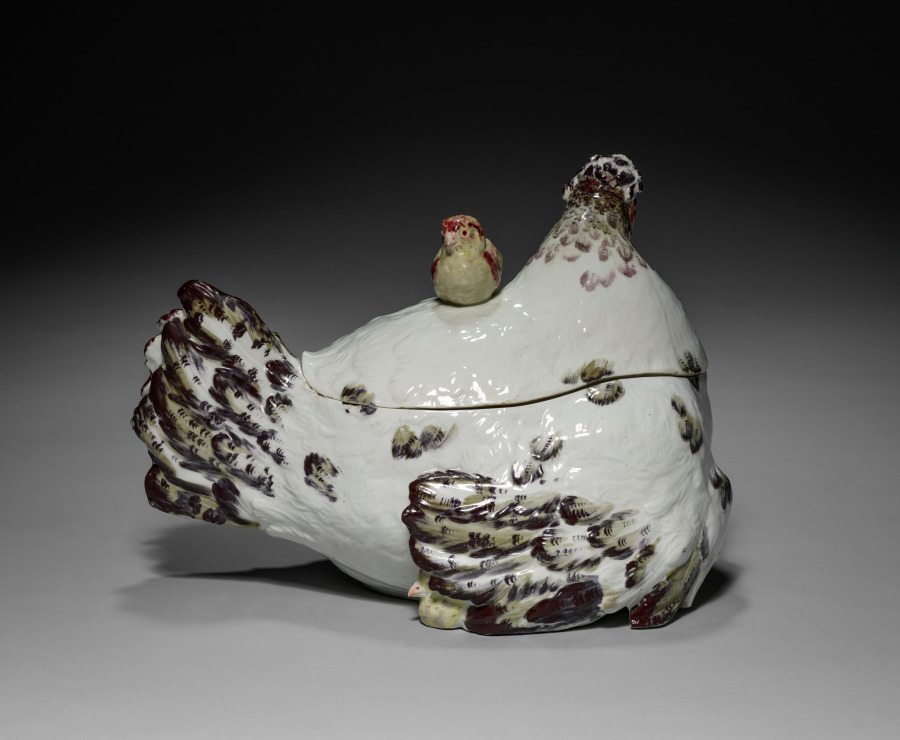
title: Hen and Chicks Covered Tureen on Stand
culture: England, London, Chelsea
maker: Chelsea Porcelain Factory (Britain, London, 1745–84)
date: c. 1755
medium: soft-paste porcelain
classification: Ceramic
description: The ceramic factory at Chelsea, located along the river Thames in western London, was Britain’s most renowned factory of decorative porcelain in the mid-1700s. Large tureens in the form of chickens or rabbits appealed to wealthy aristocrats, who took great care in developing specimen animal and poultry breeds on their country estates. The design for this particular tureen was taken from a popular seventeenth-century print by Francis Barlow depicting a farmyard.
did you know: Though the form of a soup tureen suggests a functional role at the dining table, such large, expensive porcelains were probably only used for decoration because hot liquids might have easily caused them to crack.